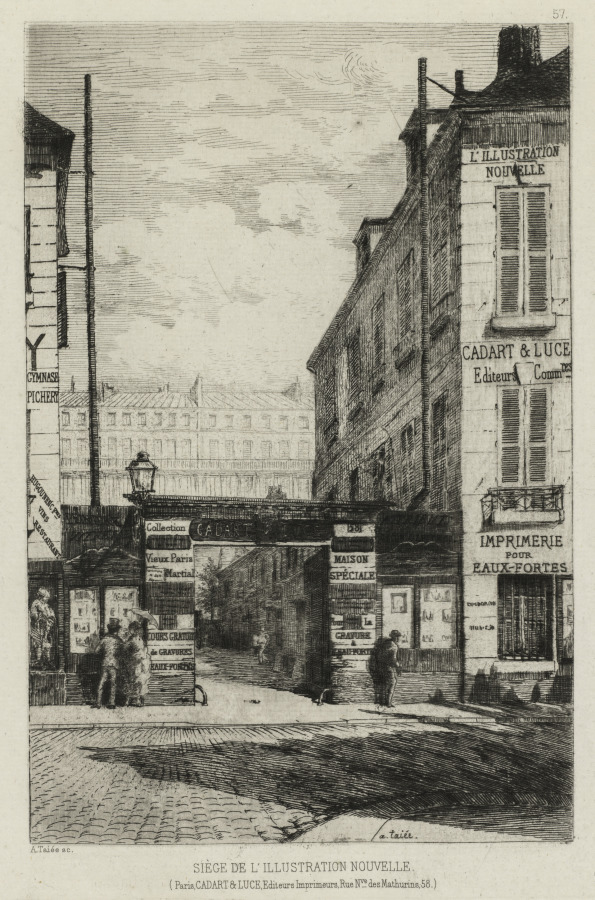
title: Headquarters of L'Illustration Nouvelle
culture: France, 19th century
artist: Alfred Taiée (French, 1820–1881)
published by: Cadart & Luce, Paris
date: 1869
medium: etching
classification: Print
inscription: Numbered on plate, upper right: 4 - 7,. Signed on plate: A. Taiée, and dated: 1871. Lettered alongside bottom with title and production detail: Imp. A. Cadart. Printed by Alfred Cadart